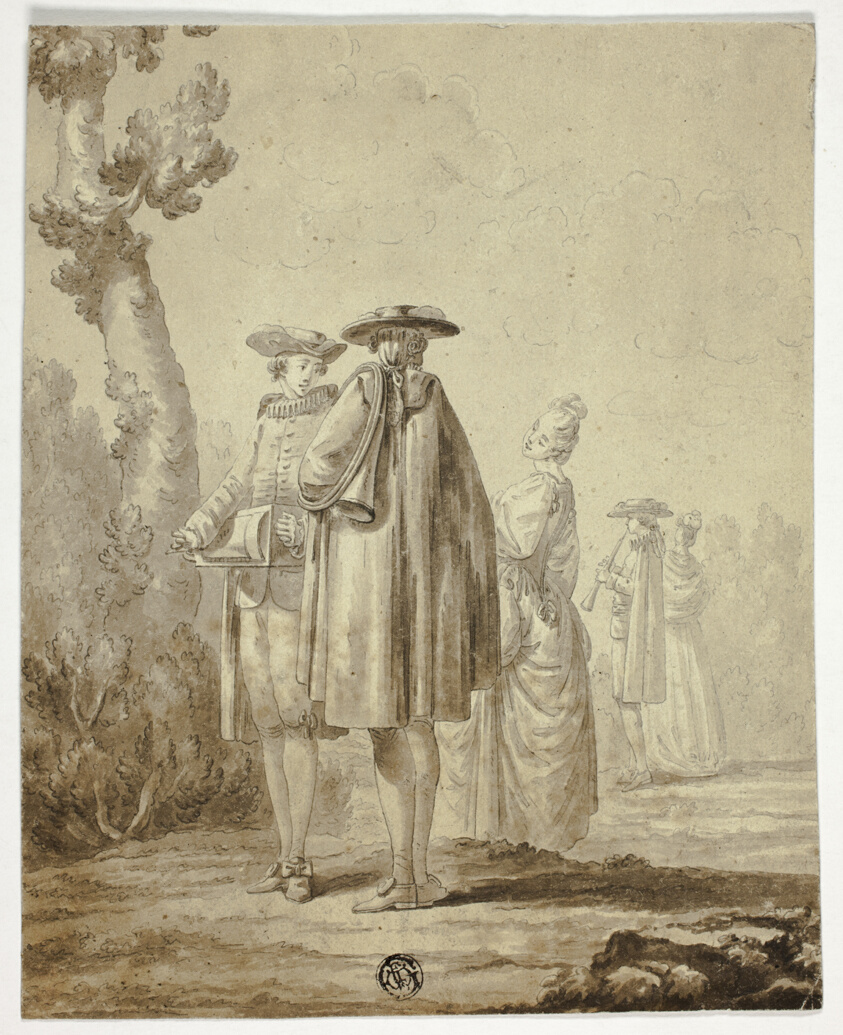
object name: Drawing and Watercolor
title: Three Musicians and Two Ladies in Outdoor Setting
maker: Unknown Artist; French, 18th century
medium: Pen and black ink, with brush and brown wash, on cream laid paper, laid down on ivory wove paper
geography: France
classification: pen and ink drawings; drawings (visual works); prints and drawing